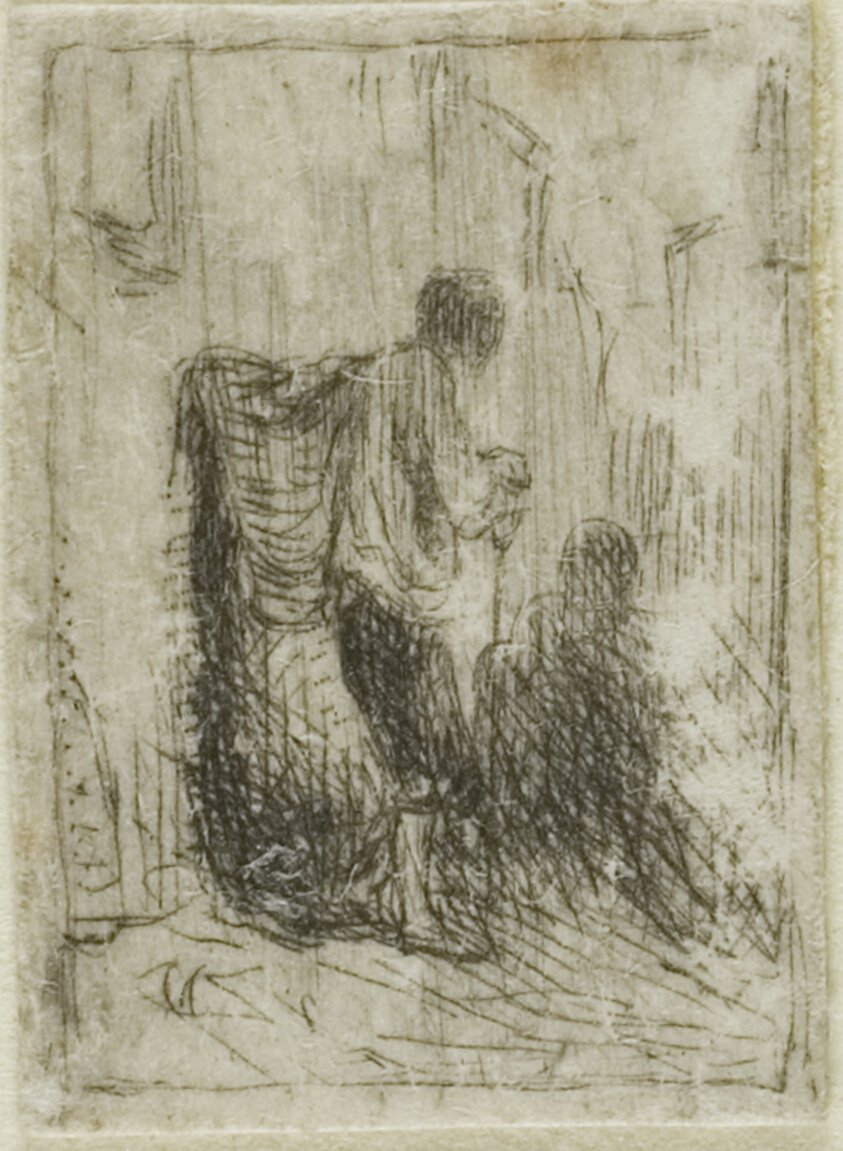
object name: Print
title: Ragman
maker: Charles Émile Jacque (French, 1813-1894)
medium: Drypoint on ivory wove paper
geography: France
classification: drypoint; print; prints and drawing